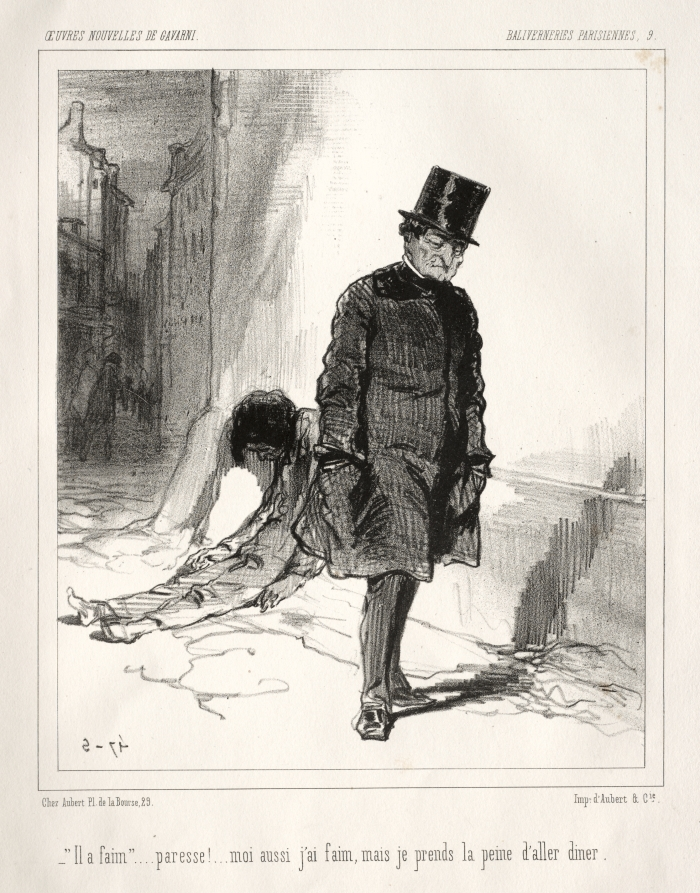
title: Baliverneries Parisiennes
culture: France, 19th century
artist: Paul Gavarni (French, 1804–1866)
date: c. 1847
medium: lithograph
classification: Print